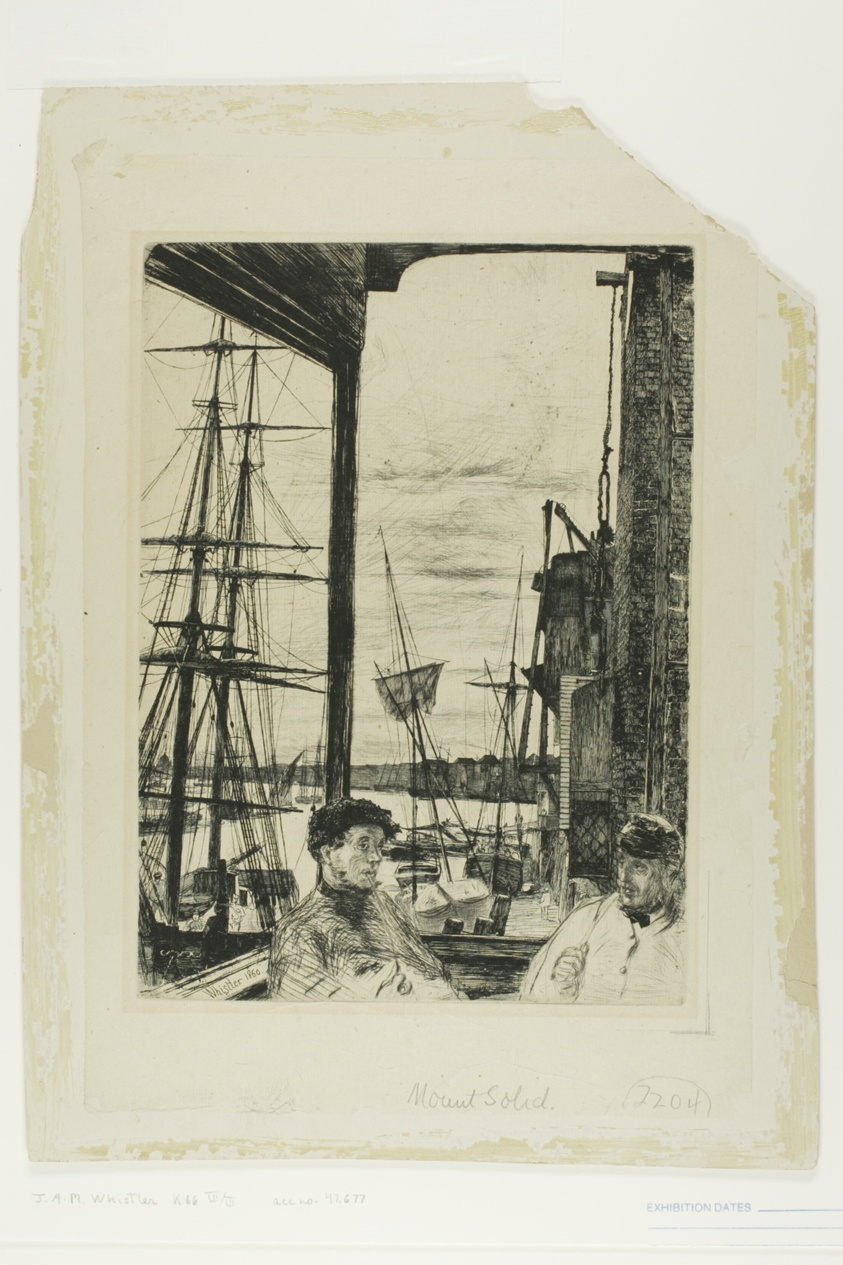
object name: Print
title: Rotherhithe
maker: James McNeill Whistler (American, 1834-1903)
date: 1860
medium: Etching with drypoint and foul biting in black ink on cream Japanese paper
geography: United States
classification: etching; drypoint; foul biting; print; prints and drawing; paper